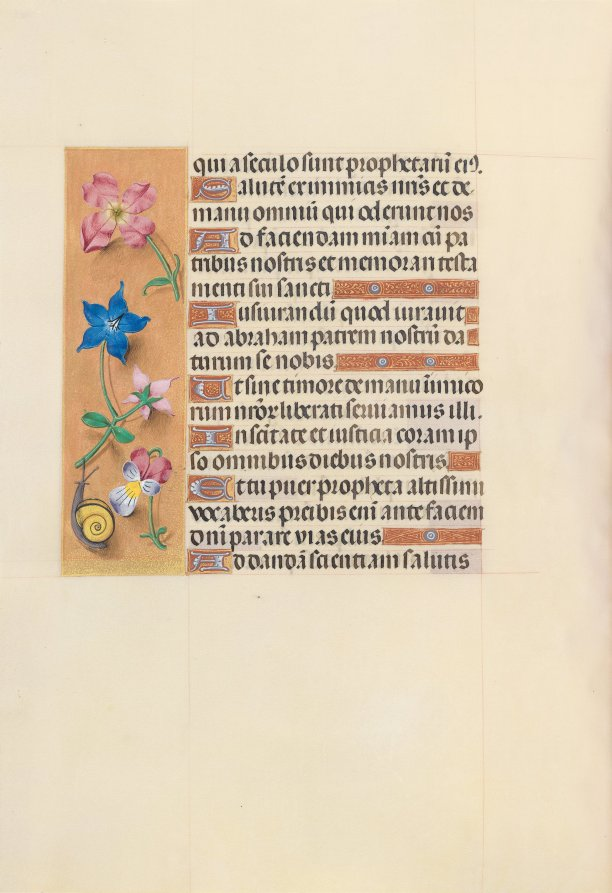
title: Hours of Queen Isabella the Catholic, Queen of Spain: Fol. 123v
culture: Flanders, Ghent and Bruges, late 15th century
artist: Master of the First Prayerbook of Maximillian (Flemish, c. 1444–1519)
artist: and Associates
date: c. 1500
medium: ink, tempera, and gold on vellum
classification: Bound Volume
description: This manuscript was illuminated by a circle of at least five highly organized manuscript painters active in the Flemish cities of Ghent and Bruges. The principal illuminator was Alexander Bening, who painted the majority of the book's miniatures. Manuscripts produced by this circle of artists are renowned for the decoration of their borders, which typically feature a rich variety of realistically-painted flowers, birds, and butterflies. This prayer book, called a book of hours, was intended not for a cleric, but for the private devotions of a lay person-in this case, Isabella the Catholic, Queen of Spain (1451-1504). Isabella's coat of arms embellishes the book's frontispiece. It is unlikely that the book was commissioned by the Queen herself; rather, she probably received it as a diplomatic gift from someone courting her patronage, perhaps Cardinal Francisco Jimenez de Cisneros. A Franciscan friar, Jimenez was dependent upon Isabella for his advancement, first to the post of Queen's confessor in 1492, and then to Archbishop of Toledo in 1495.